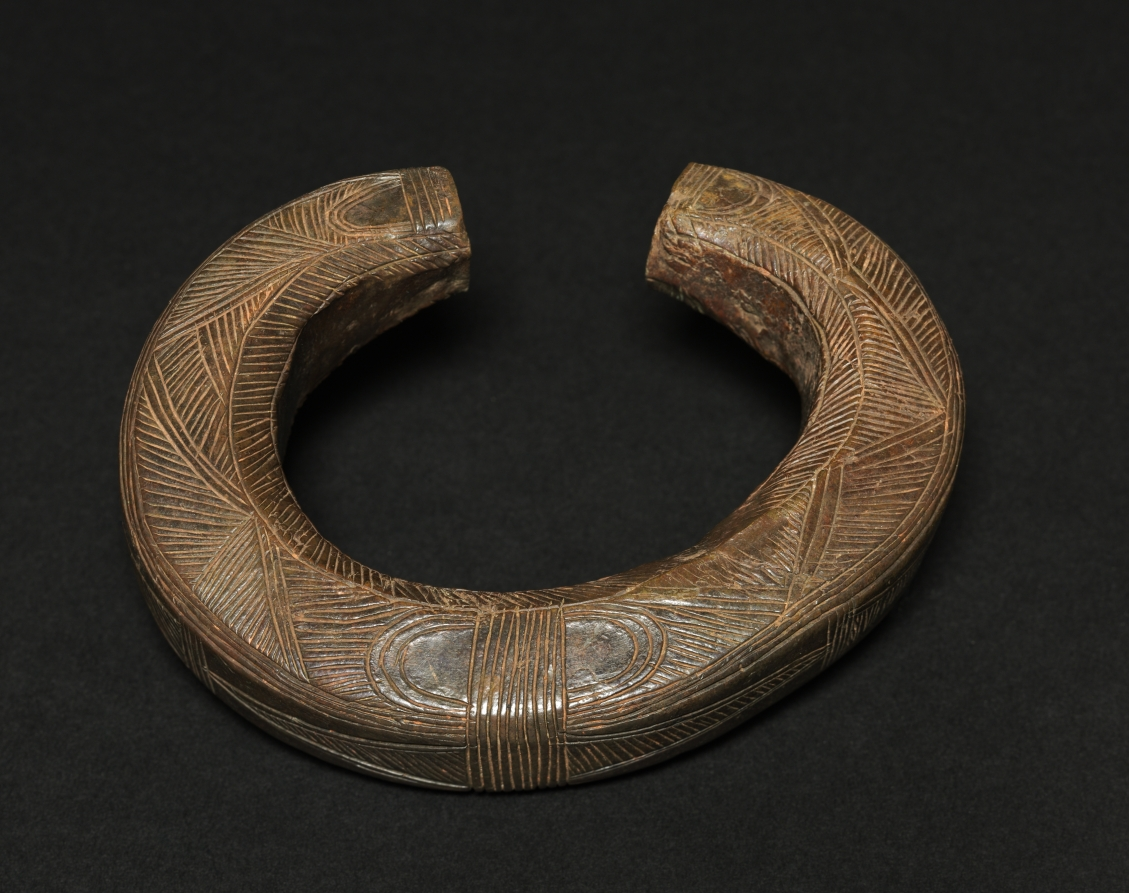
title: Bracelet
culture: Africa, Central Africa, Gabon, Fang-style maker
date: 1900s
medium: Copper alloy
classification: Jewelry